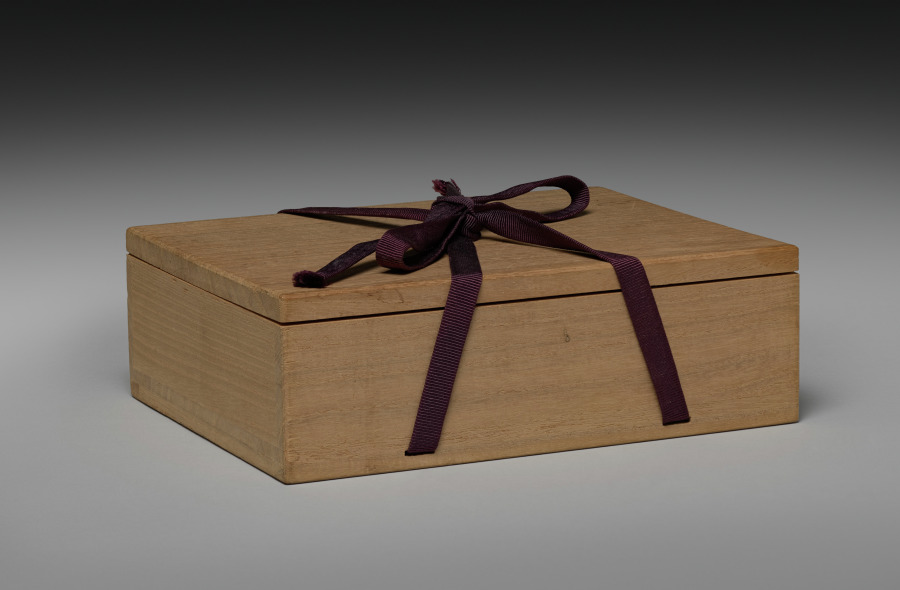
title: Knife Sheath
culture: Korea, Goryeo dynasty (918–1392)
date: 1100s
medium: Gilt silver (body) and brass (trefoil-shaped ring)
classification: Metalwork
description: Made by rolling a flat piece of silver plate, this knife sheath is decorated on each side with oval panels, including two larger middle panels showing an image of rising dragons with ring-punched scales. The circular upper panels bear the image of seated phoenixes. The flat bottom is engraved with a pair of fish, symbolizing harmonious unity. The trefoil-shaped ring attached to the tip of the sheath allows a string to connect it as a pendant to a belt. In medieval Korea, a miniature sheath such as this was considered an important fashion item, especially for elite members of the ruling class.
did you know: This 12th-century silver-gilt knife sheath is meant to be a pendent to a belt as a luxury ornament.